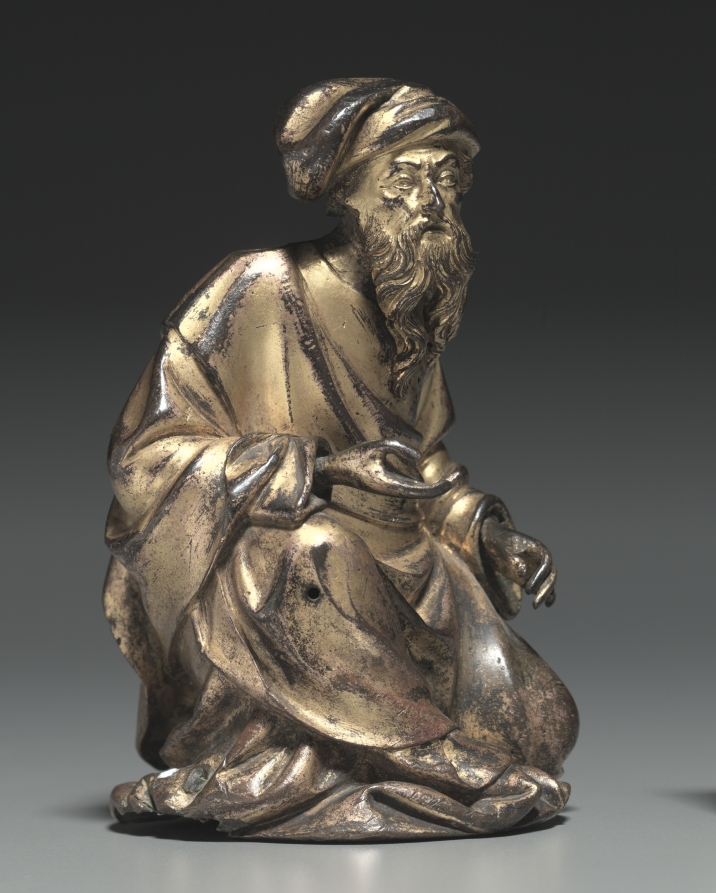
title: Kneeling Prophet from the Reliquary Chasse of Saint-Germain-des-Prés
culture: France, Paris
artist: Jean de Clichy (French)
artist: Gauthier du Four (French)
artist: and Guillaume Boey (French)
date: 1409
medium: gilt bronze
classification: Sculpture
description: This figure is one of only two known surviving fragments of the Reliquary Châsse of Saint-Germain. Fashioned from silver, gold, and precious stones, it was designed to hold the body of the saint. A contract from 1409 gives the names of the commissioned goldsmiths: Jean de Clichy, Gautier du Four, and Guillaume Boey.The reliquary was housed in the ancient Benedictine Abbey of Saint-Germain-des-Prés in Paris and formed the monastery’s great treasure until it was destroyed in the French revolution. The exquisite modeling of the prophet, originally a supporting foot of the reliquary, reveals the sophistication of Paris around 1400.